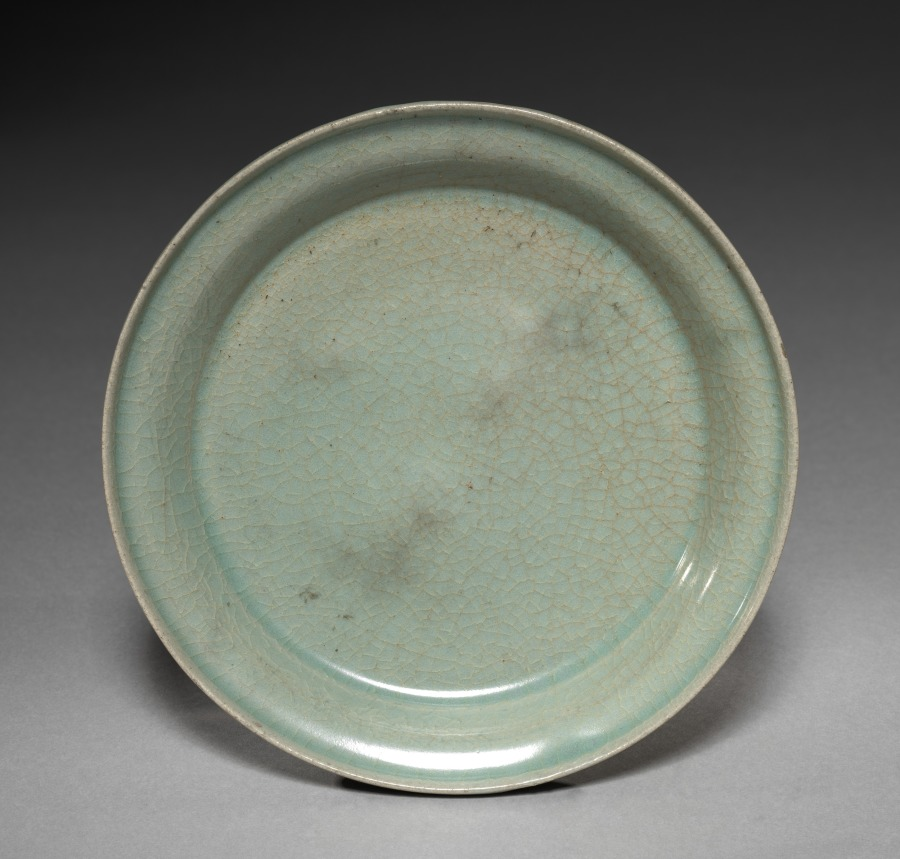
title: Saucer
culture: Korea, Goryeo dynasty (918–1392)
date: 1100s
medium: pottery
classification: Ceramic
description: As early as the seventh century, the practice of drinking tea and wine became an important part of elite culture in Korea. Elites of the Goryeo period commissioned a variety of types of utensils and vessels including this saucer paired with a large bowl, to make their drinking experience more exciting.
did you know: The crackle pattern that appears all over this saucer was caused by a thermal expansion mismatch between the body and the glaze.